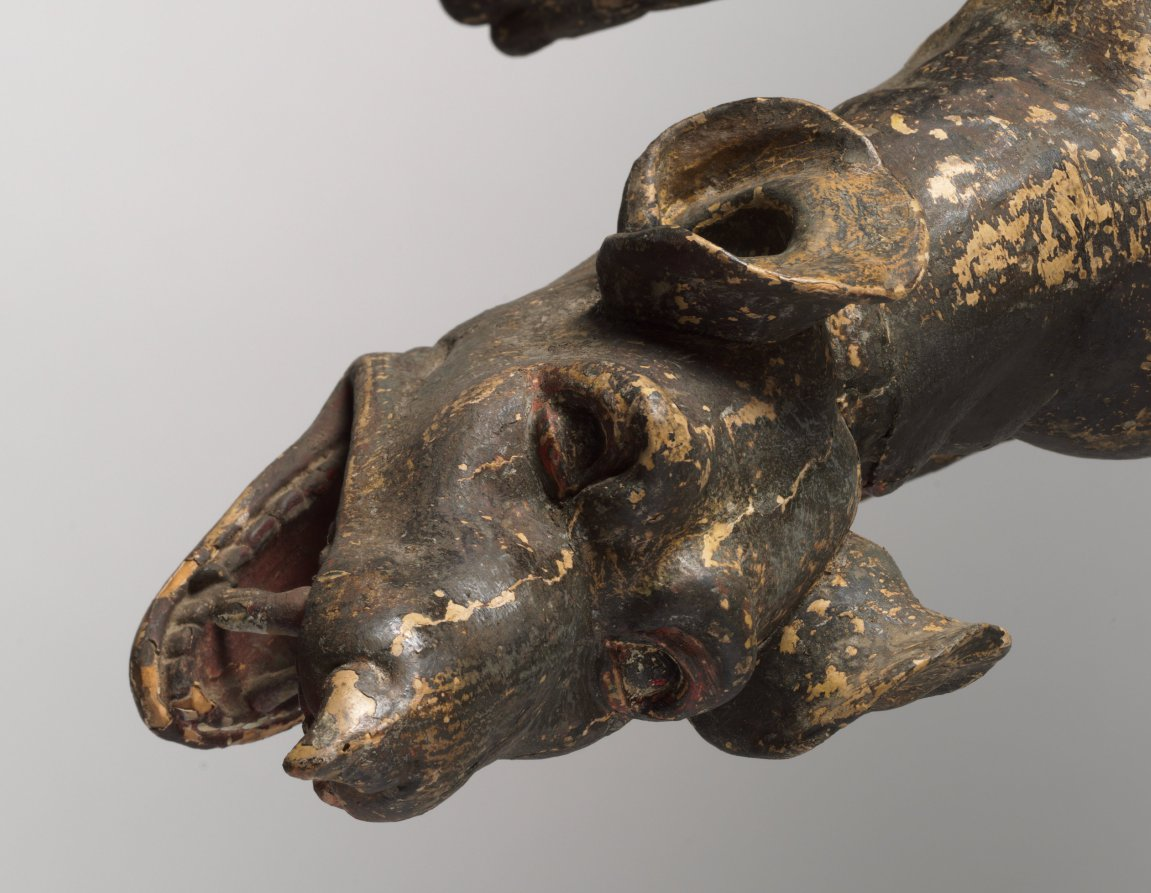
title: Saint George and the Dragon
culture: South Germany or Austria, late 17th century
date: late 1600s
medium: painted and gilded wood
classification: Sculpture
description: Saint George, a Roman soldier martyred for his Christian faith, is best known for slaying a fearsome dragon that terrorized the city of Silene, in Libya. George offered to kill the monster if residents of the city convert to Christianity. Here, George stands triumphantly over the dragon, writhing as it dies. The artist deliberately incorporated features intended to make his figure seem more familiar: the dragon seems more canine than reptilian, while George wears armor from the recent past and bears almost portrait-like facial features.